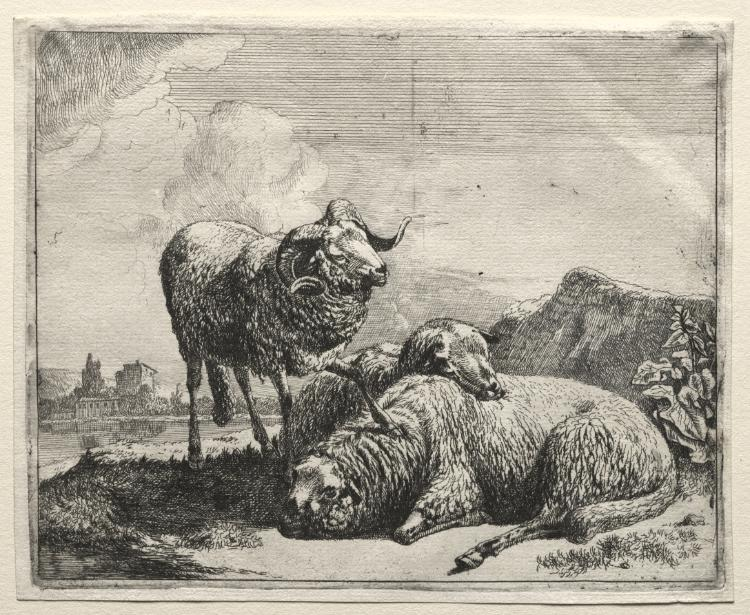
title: Ram and Two Sheep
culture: Germany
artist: Johann Heinrich Roos (German, 1631–1685)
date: 1665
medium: etching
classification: Print